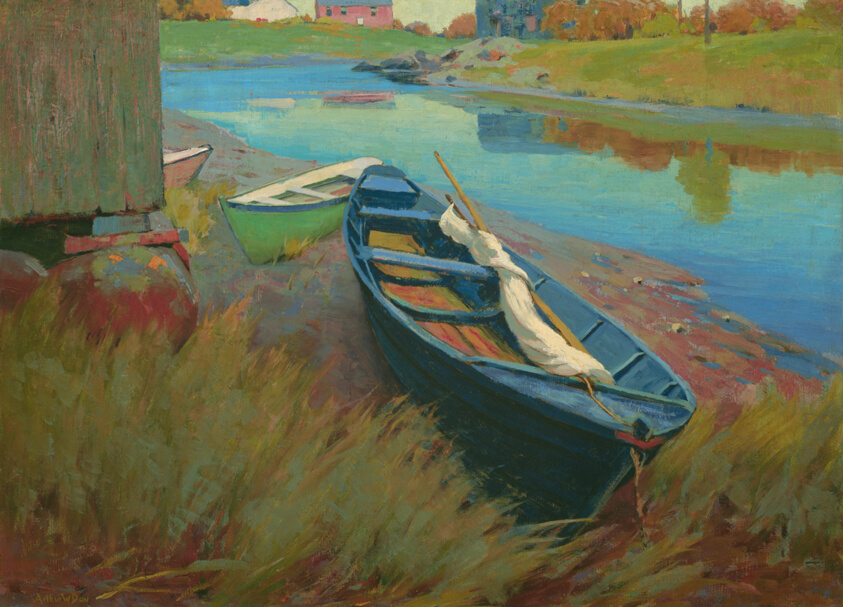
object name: Painting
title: Boats at Rest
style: Impressionism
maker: Arthur Wesley Dow (American, 1857–1922)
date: c. 1895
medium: Oil on canvas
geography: Ipswich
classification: painting; american arts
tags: landscapes, weather/seasons, water